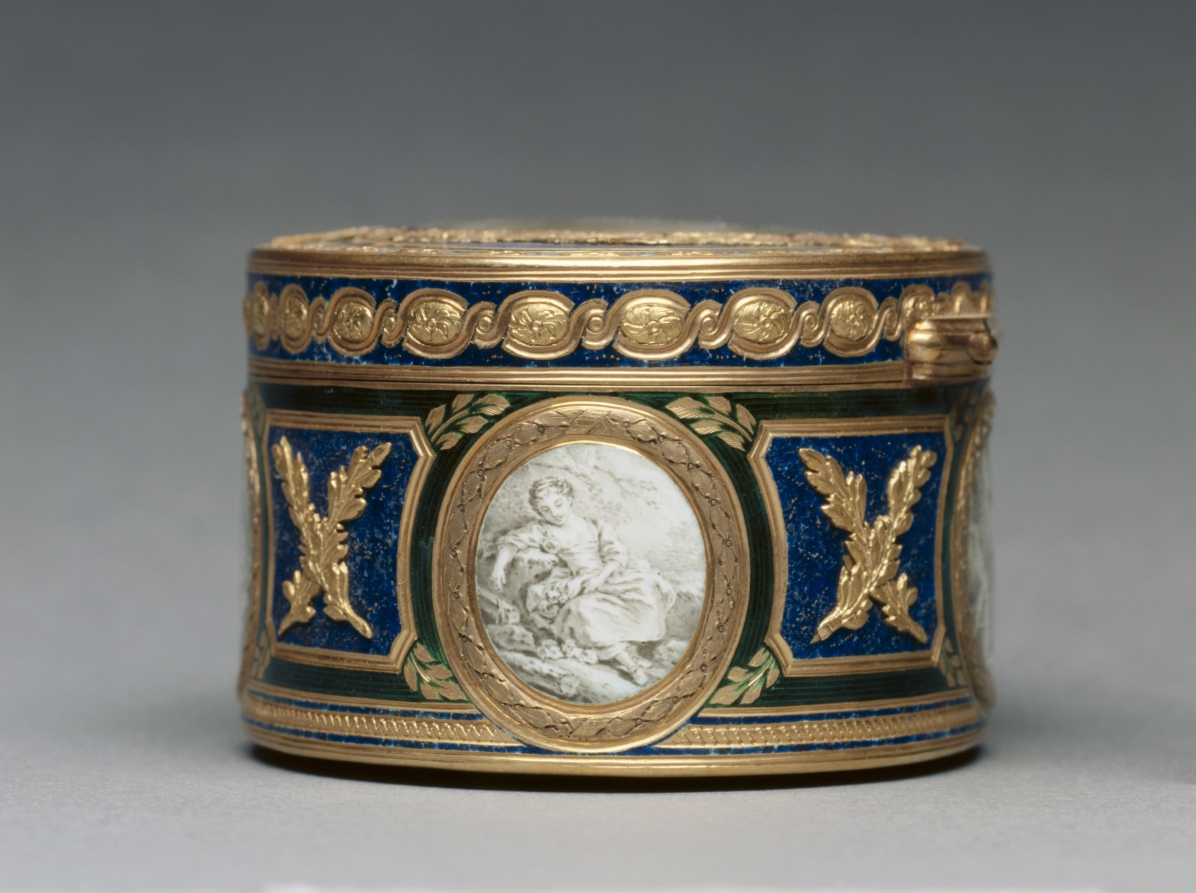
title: Snuff Box (Tabatière) with Portrait of Marie Antoinette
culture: France, 18th century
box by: Pierre-François-Mathis de Beaulieu (French)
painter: François Dumont (French, 1751–1831)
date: 1768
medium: watercolor on ivory in a gold and enamel box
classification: Enamel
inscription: [Maker's mark of Pierre-François-Mathis de Beaulieu, master goldsmith in 1768, inside cover]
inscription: [Charge mark of Jean-Jacques Prévot, 1762-1768, inside cover]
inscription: [Warden's mark of Paris, 1768-1769, inside cover]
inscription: [Discharge mark of Julien Alaterre, Paris, 1768-1774, on neck at right]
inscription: [Inside box, the letter]: "F"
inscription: [On bezel at left, engraved number]: "627"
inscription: [On front of bezel, engraved signature]: "Ve Georges Beaulieu à Paris"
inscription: [On right of miniature portrait, the letter]: "D"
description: This box was created through the collaboration of two skilled and well-known artisans of the period, master goldsmith Pierre-François-Mathis de Beaulieu and celebrated miniature painter François Dumont. The portrait of Marie Antoinette on the box's lid is painted in Dumont’s own style while those on the sides and bottom of the box take inspiration from the work of painter François Boucher, known for his pastoral scenes in the Rococo style.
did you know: Marie Antoinette, queen consort of French King Louis XVI and great patron of the decorative arts, was executed in 1793 at the end of the French Revolution.